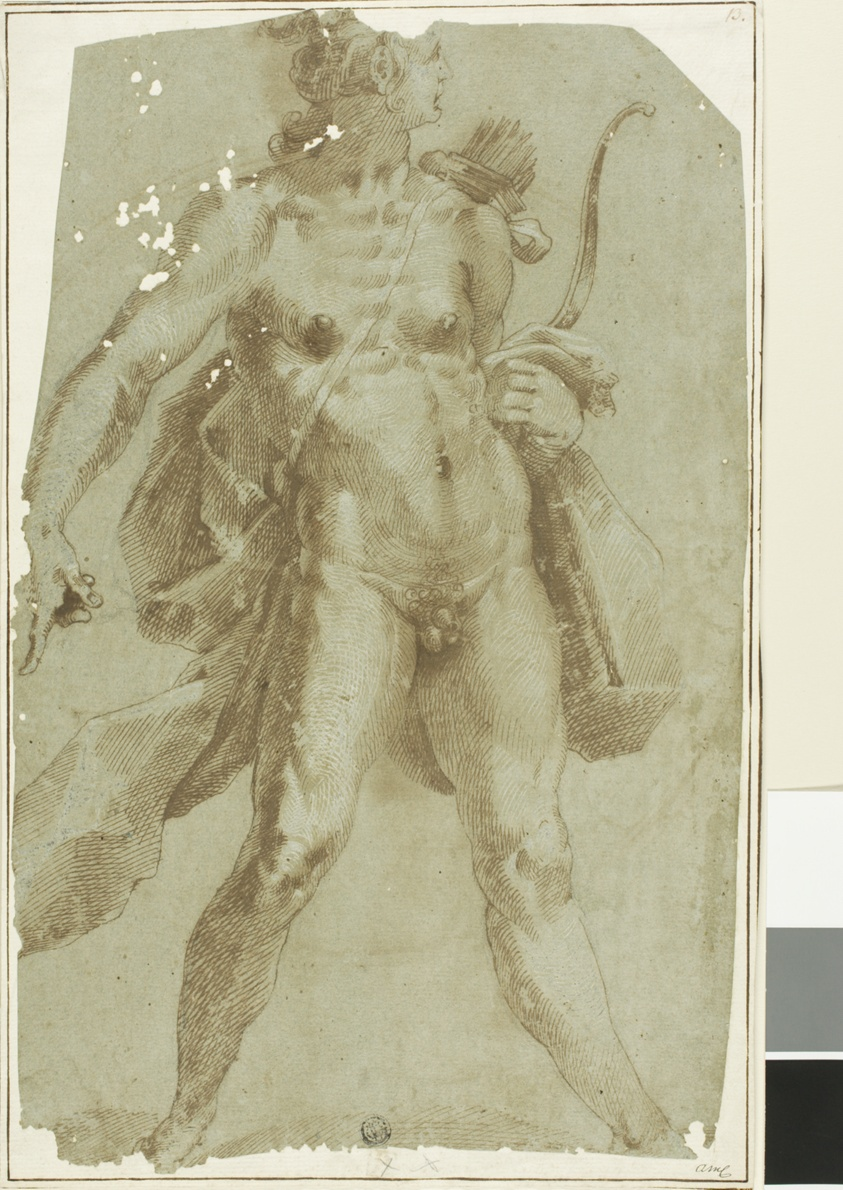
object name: Drawing and Watercolor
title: Apollo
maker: After Jan Harmensz Muller; Dutch, 1571-1628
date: c. 1600-1620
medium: Pen and brown ink, heightened with lead white (partly discolored), over black chalk, on blue laid paper, laid down on ivory laid paper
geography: Netherlands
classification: pen and ink drawings; drawings (visual works); prints and drawing